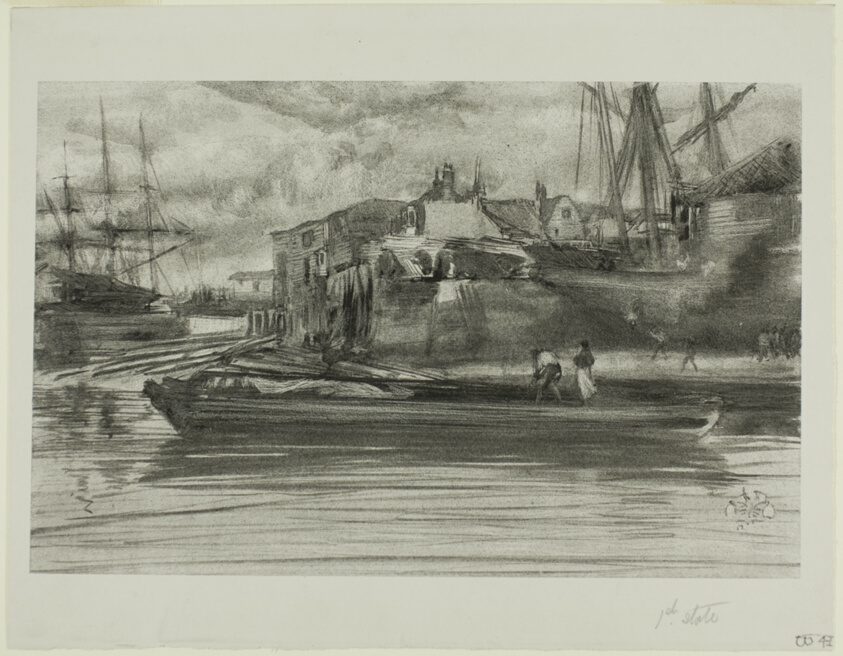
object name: Print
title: Limehouse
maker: James McNeill Whistler (American, 1834-1903)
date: 1878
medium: Lithotint, in black ink, with scraping and incising, on a prepared half-tint ground, on ivory plate paper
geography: United States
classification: lithotint; lithograph; print; prints and drawing; paper